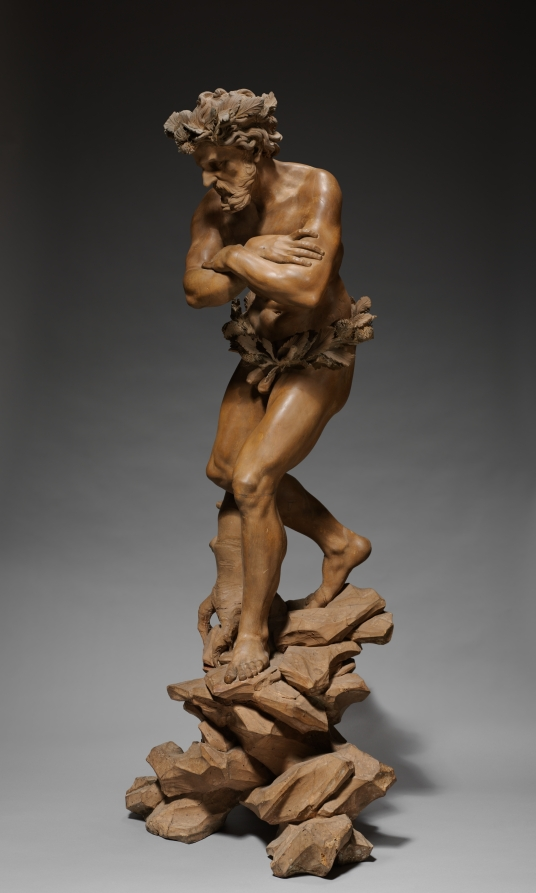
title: Winter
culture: Italy, 17th century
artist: circle of Filippo Parodi (Italian, 1630–1702)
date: c. 1700–1725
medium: wood with traces of gesso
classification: Sculpture